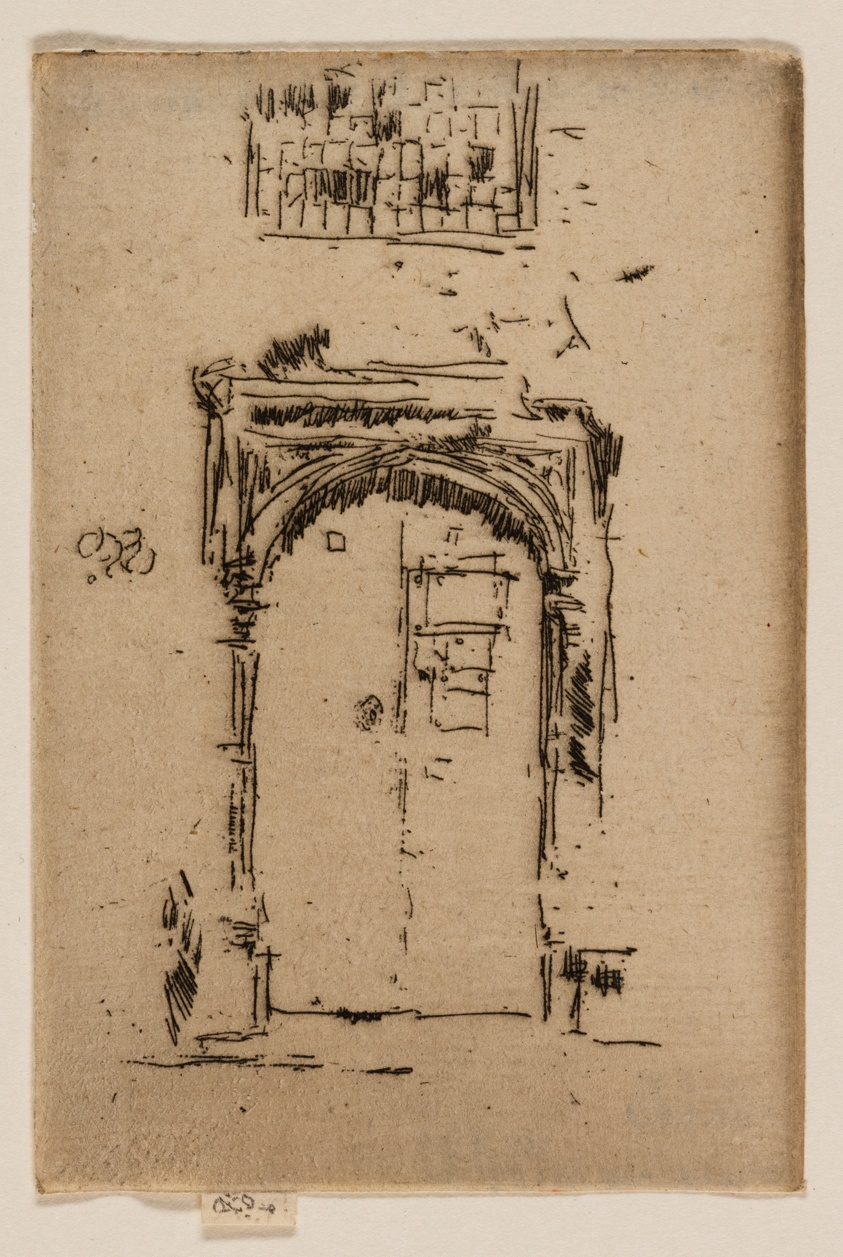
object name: Print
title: Church Doorway, EdgwareImpression: Art Institute of ChicagoArt Institute of Chicago(1924.659)Church Doorway, Edgware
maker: James McNeill Whistler (American, 1834-1903)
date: 1887/1888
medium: Etching in black ink on cream laid paper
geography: United States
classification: etching; print; prints and drawing; paper